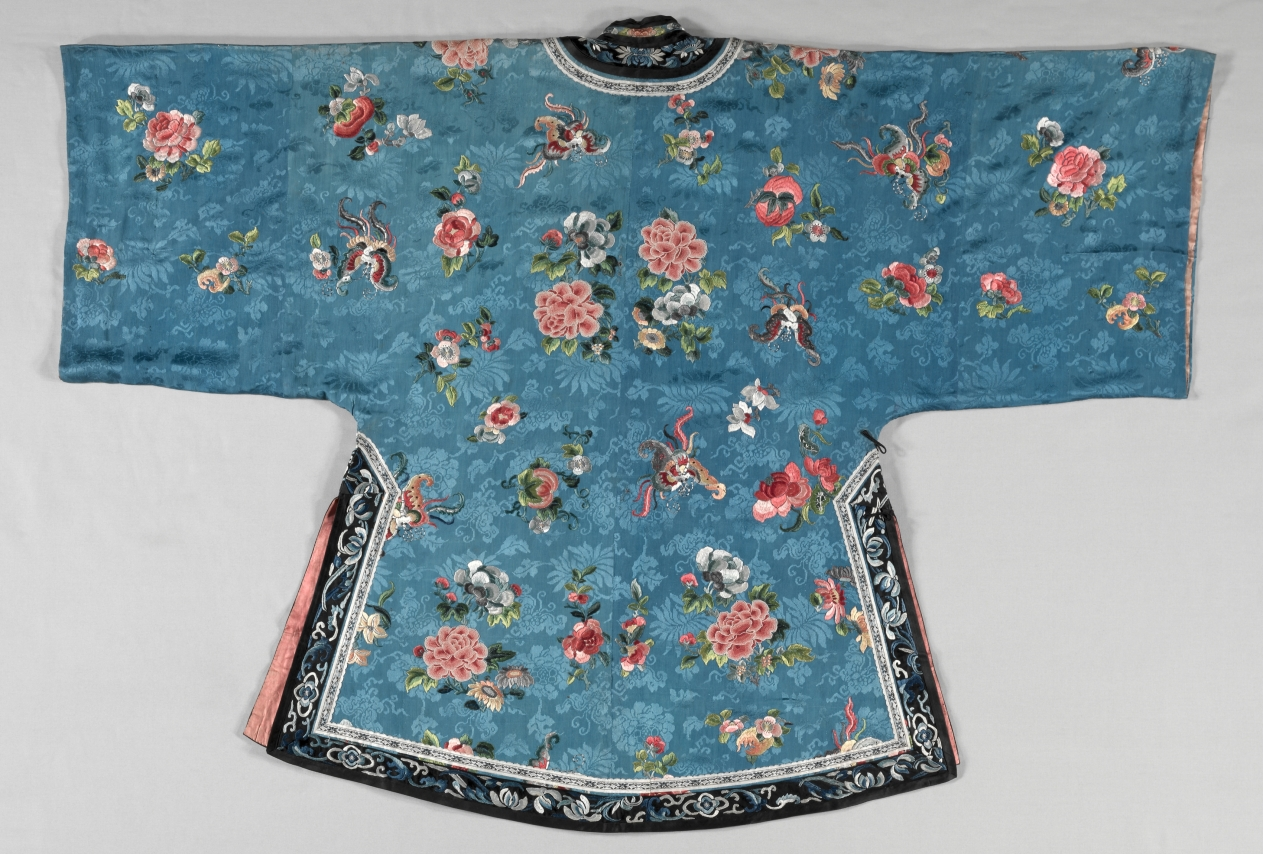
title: Han Woman's Jacket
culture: China, Qing dynasty (1644–1911)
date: 1880s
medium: Silk: embroidery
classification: Garment